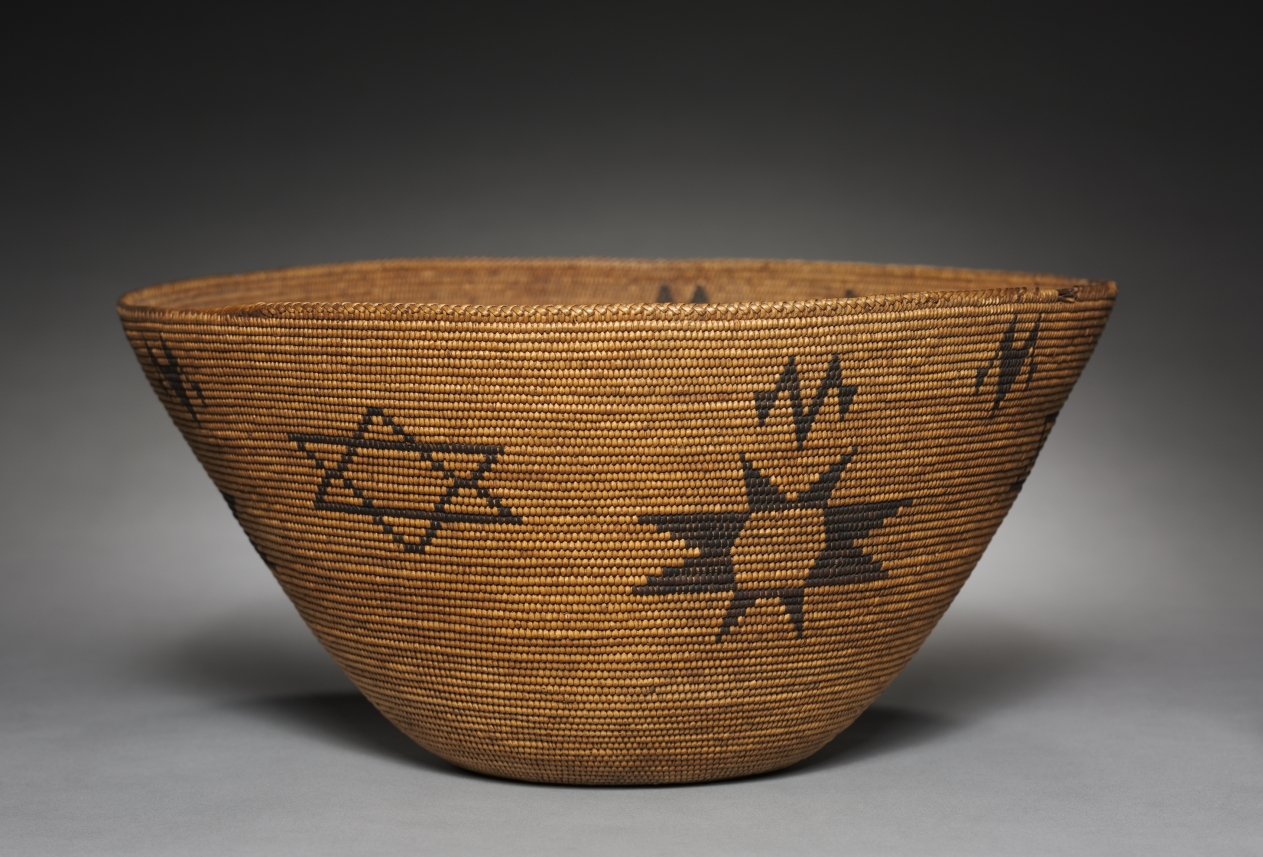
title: Cooking Bowl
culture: Great Basin, Washoe, late 19th- early 20th century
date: 1890s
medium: Willow, Bracken fern root; coiled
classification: Basketry